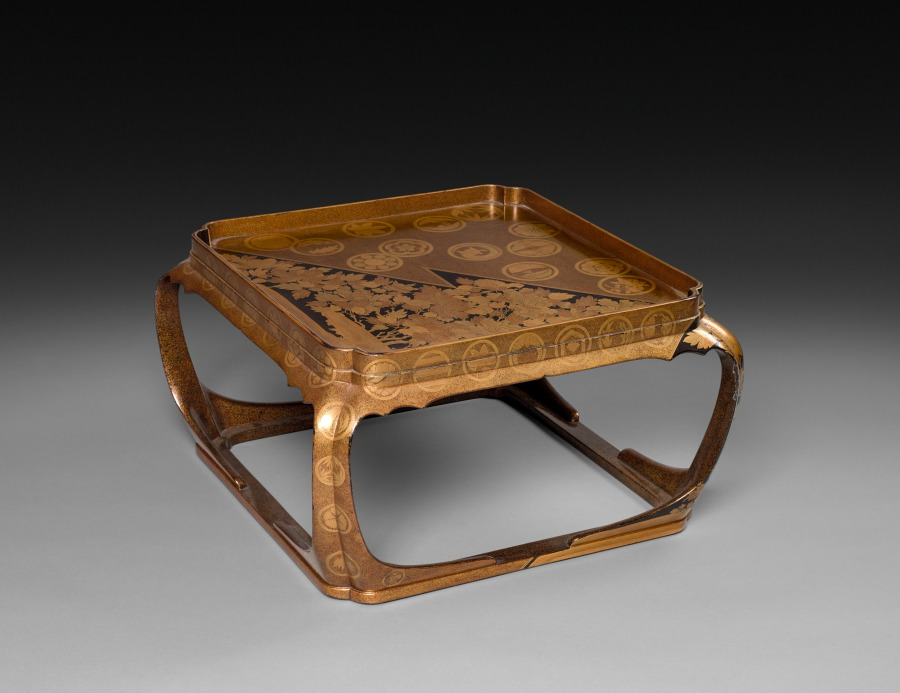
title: Table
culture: Japan, Meiji period (1868–1912)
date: 1868–1912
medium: lacquer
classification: Lacquer